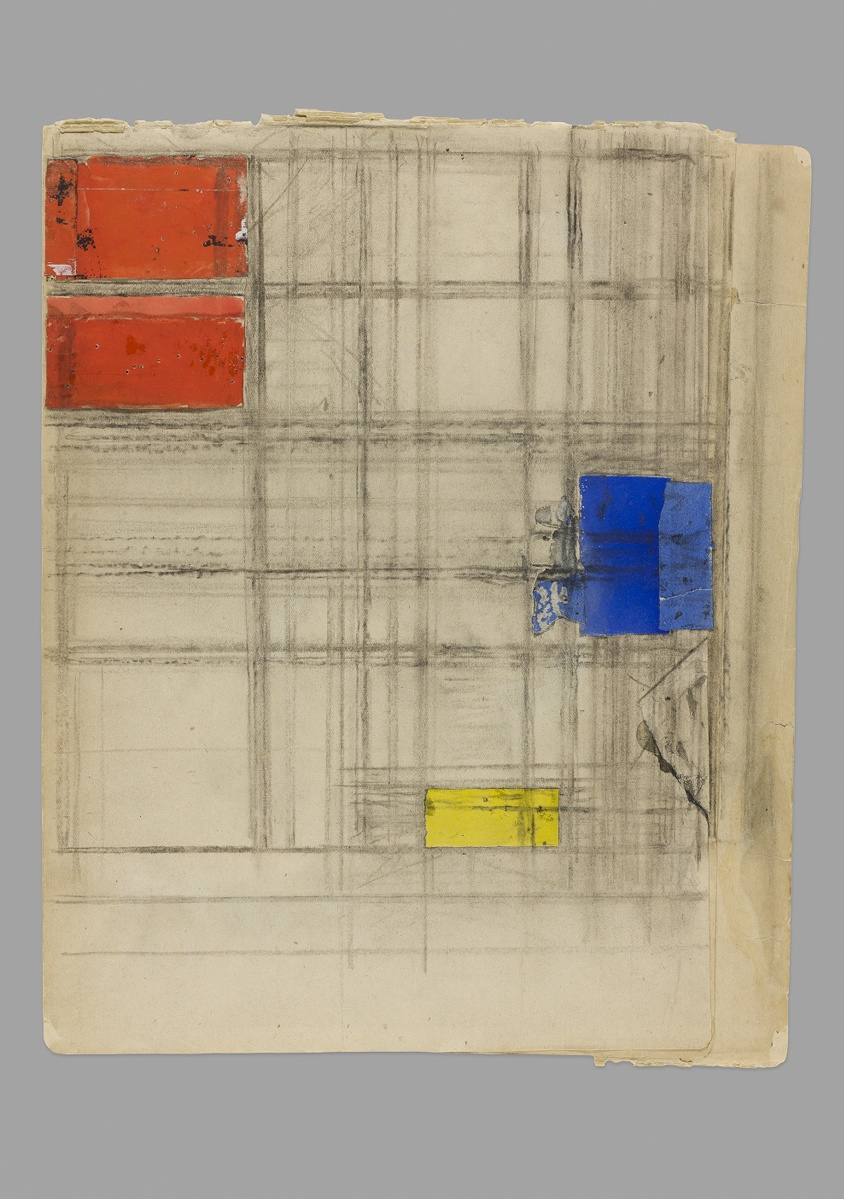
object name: Drawing and Watercolor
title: Study for a Composition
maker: Piet Mondrian (Dutch, 1872-1944)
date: 1940–41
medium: Collage of cut and pasted papers, prepared with gouache and charcoal, on pieced cream wove newsprint in three parts with charcoal on verso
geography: Netherlands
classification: collage; drawings (visual works); prints and drawing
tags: study